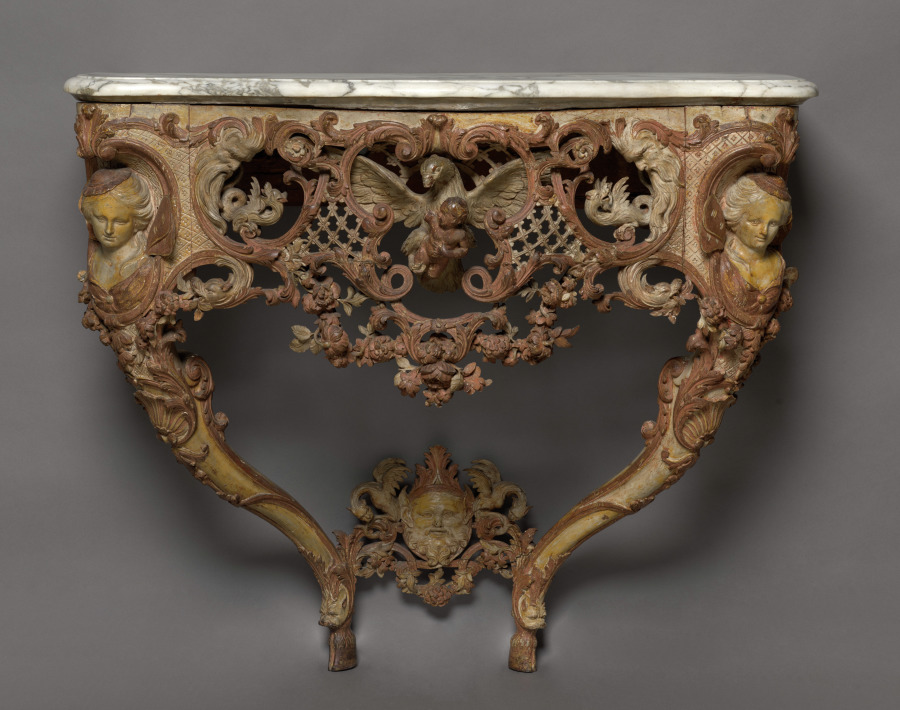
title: Console Table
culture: France, 18th century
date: c. 1720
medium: carved and painted wood, marble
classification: Furniture and woodwork